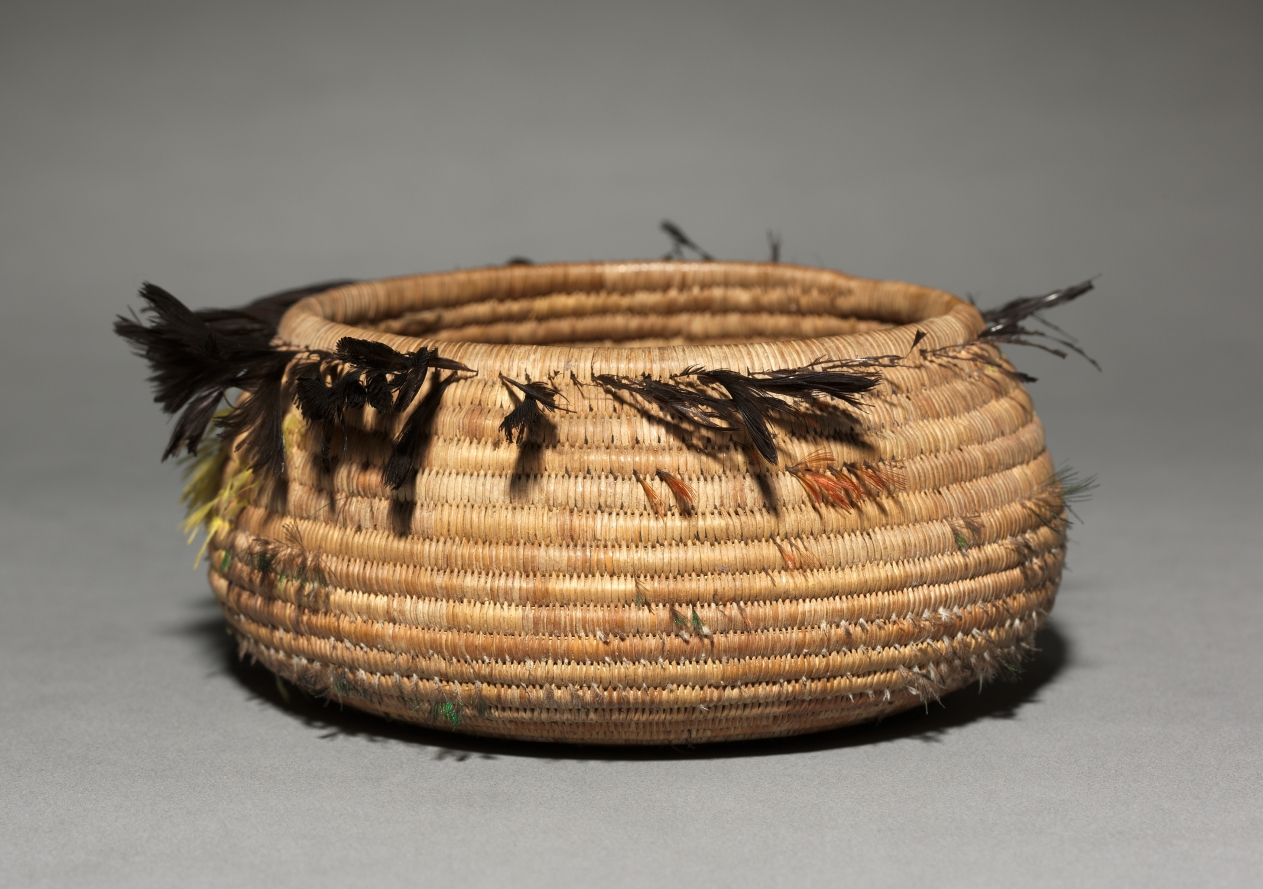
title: Gift Bowl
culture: California, Pomo, Eastern, Late 19th- Early 20th century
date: 1900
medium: Sedgw with Feathers; Coiled (3 rods)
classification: Basketry